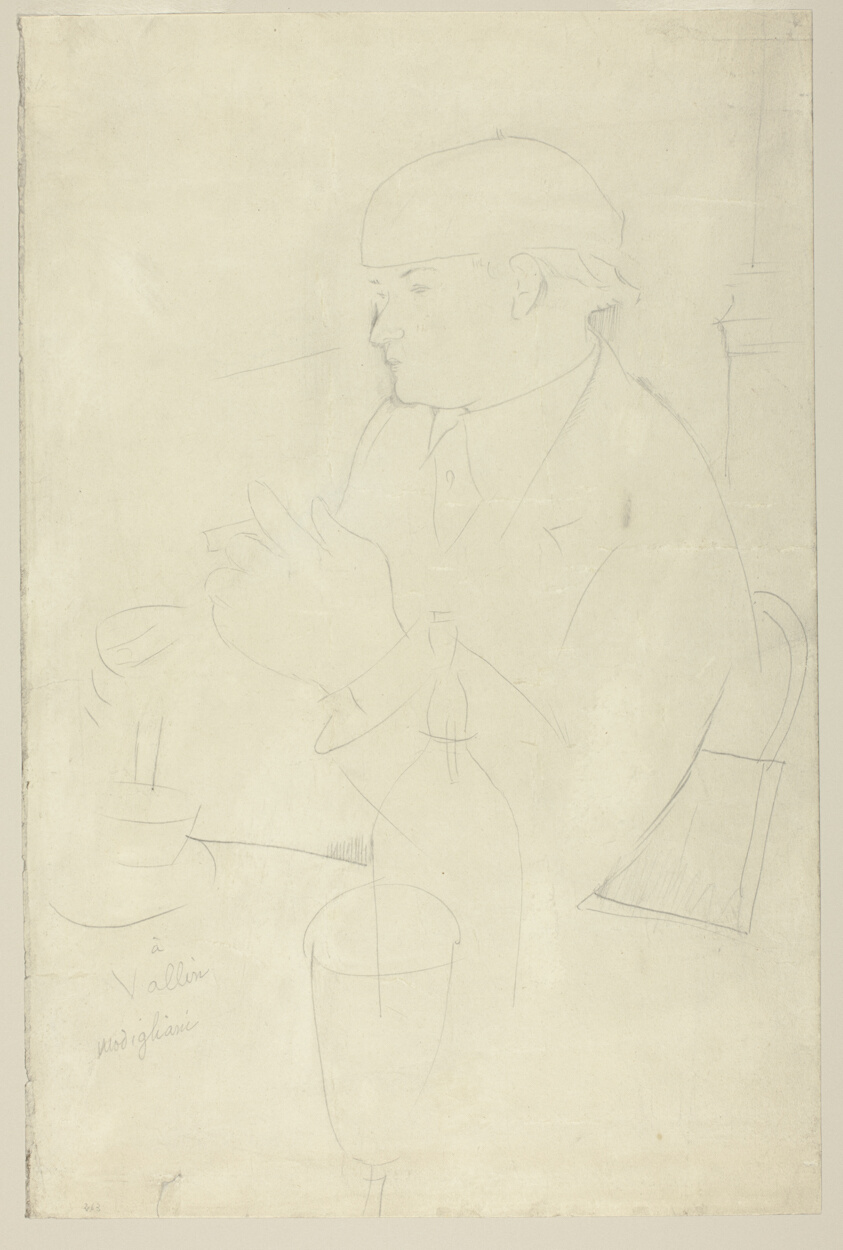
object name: Drawing and Watercolor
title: Portrait of Vallin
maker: Amedeo Modigliani (Italian, 1884-1920)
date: 1918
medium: Graphite on cream wove paper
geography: Italy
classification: graphite; drawings (visual works); prints and drawing